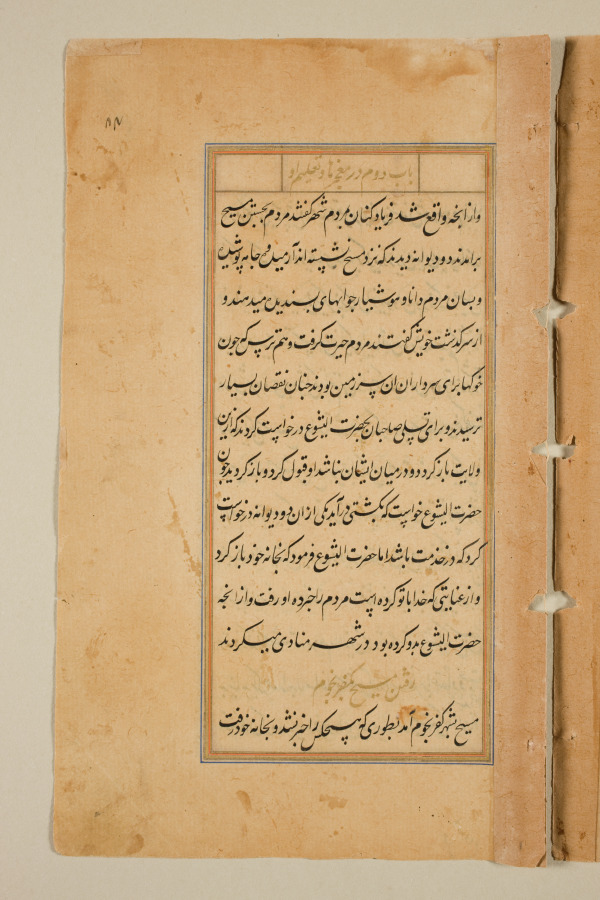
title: Text page from a Mirror of Holiness (Mir’at al-quds) of Father Jerome Xavier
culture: Mughal India, Allahabad, made for Prince Salim (1569–1627)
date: 1602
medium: Ink and gold on paper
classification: Manuscript